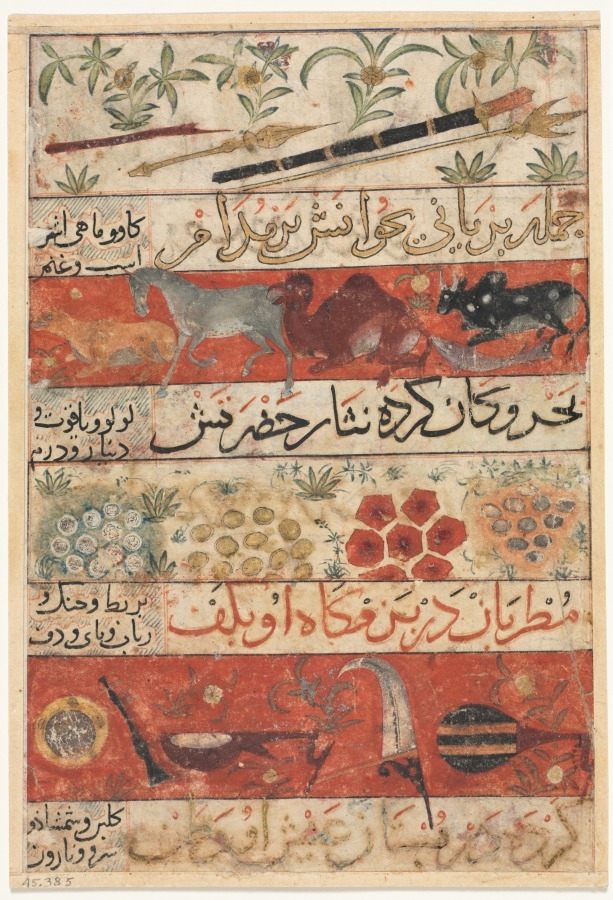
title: Animals, Precious Stones, Coins, and Musical Instruments (recto); Animals, Birds, and Plants (verso) from a Mu'nis al-Ahrar fi Daqa'iq al-Ash'ar (The Free Men's Companion to the Subtleties of Poems) of Muhammad Ibn Badr al-Din Jajarmi (active 1340s)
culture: Iran, Shiraz, Ilkhanid period (1256-1353)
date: c. 1341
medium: opaque watercolor, ink, and gold on paper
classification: Manuscript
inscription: Script: Thulth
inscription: (text on the previous page, leaf 2f, Harvard University Art Museums, 1960.186) In the hands of his slaves and of his friends are:/ Spear and sword, javelin and pen./ Ever all roasted at his table are:/ Ox and fish, camel and horse and sheep./ Ocean and mine have showered on his presence:/ Pearl and ruby, coined gold and silver/ The minstrels at his banquet bear in their hands:/ Lute and harp, rebec, pipe and tambourine./ Making the garden of his pleasure their homeland are:/ Rosebush and box-tree, cypress and elm./ Prey to hawk and prey to his cheetah are:/ Vulture and sīmurgh, elephant and rhinoceros./ Sun and Moon, Venus and Mercury are at his feast:/ Falcon-drum and goblet, bowl and candlestick./ Overwhelming the corpses of his foes are:/ Porcupine and stork, raven and kite.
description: This is one of several pages that were removed from a unique manuscript of this otherwise unknown work, which bears a colophon stating that it was written by the author and finished "Ramadan, 741" (February 1341). Illustrations on both sides include various animals, trees, and objects such as weapons, musical instruments, and jewels.